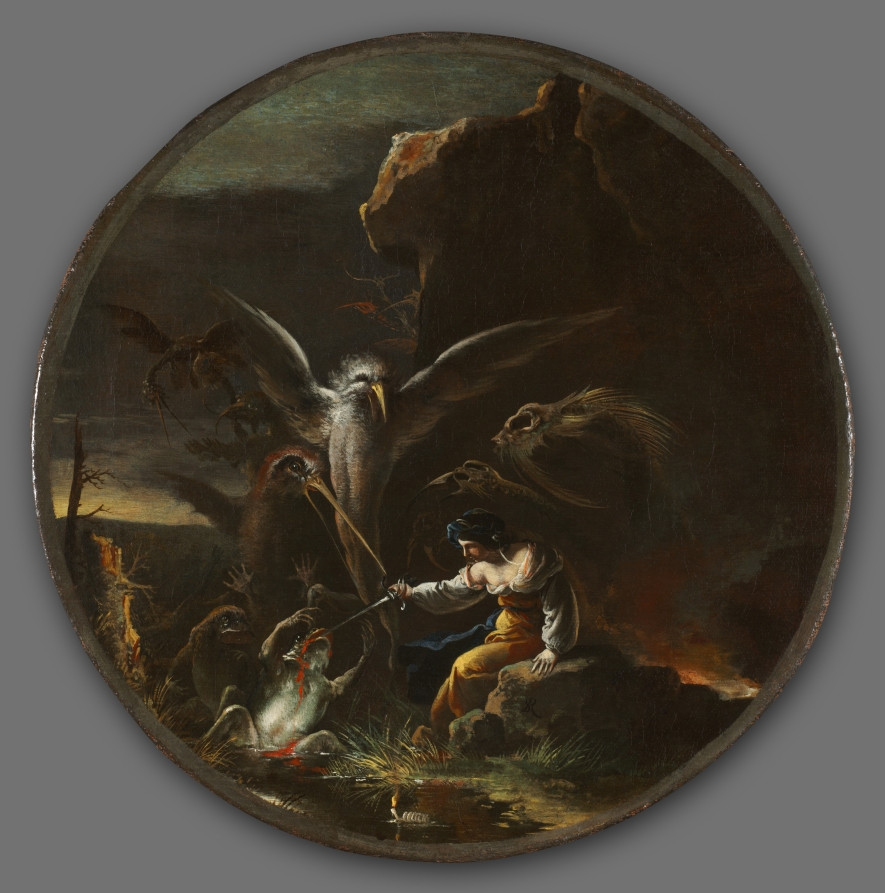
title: Scenes of Witchcraft: Morning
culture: Italy, 17th century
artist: Salvator Rosa (Italian, 1615–1673)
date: c. 1645–1649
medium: oil on canvas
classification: Painting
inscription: Signed: "SR [monogram]"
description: Rosa's first scene depicts a young witch who plunges her knife into a writhing amphibian at dawn. The dark clouds of daybreak and anthropomorphic crags provide a gloomy atmosphere, while malevolent birds with piercing beaks hover around the central stabbing, focusing the viewer's attention on the witch's vicious act. The only beautiful enchantress Rosa ever painted, her elegance and ability to transform men into animals evokes the goddess Circe. But Rosa wasn't interested in classical imagery; he inverted expectations by transforming Circe into an explicitly violent sorceress. Her calm expression makes the terrifying gesture of upraised human hands among the birds even more disturbing.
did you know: The artist chose the painting's shape to reference the foundational role of the circle in practicing magic.